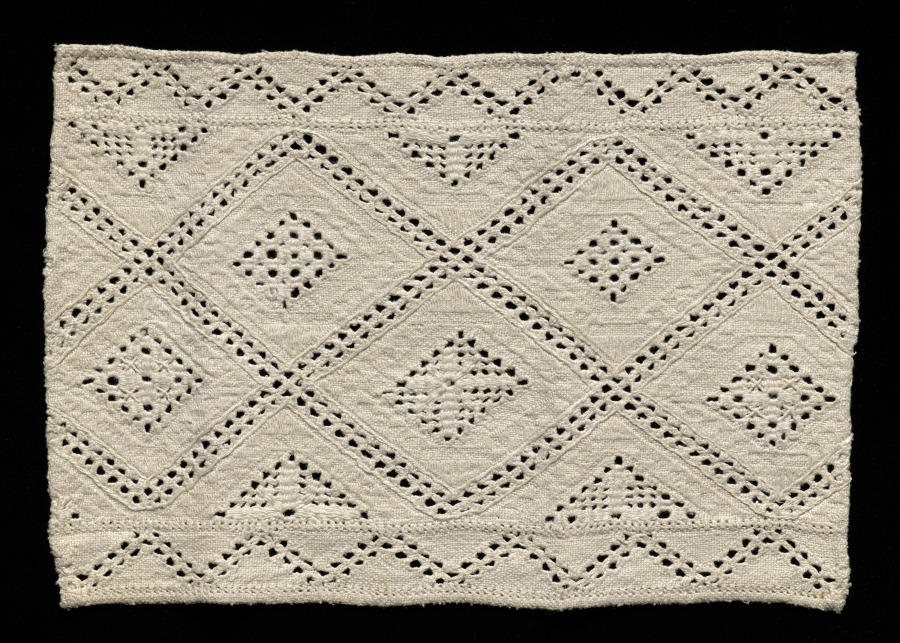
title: Lace Fragment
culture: Italy ?, 1800-1935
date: 1800–1935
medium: Linen: needle lace (drawnwork)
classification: Lace